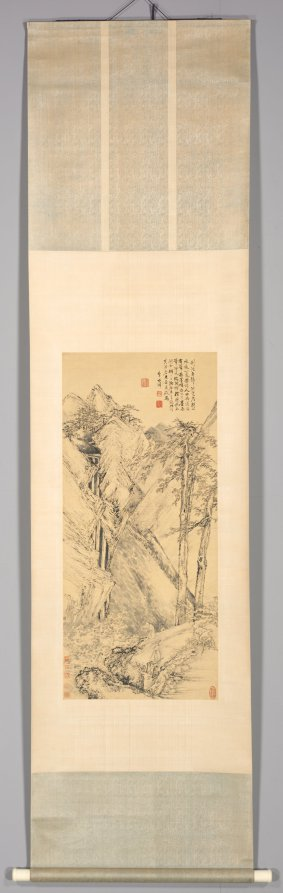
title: Landscape after Jing Hao and Guan Tong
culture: China, Qing dynasty (1644-1911)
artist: Li Shizhuo (Chinese, c. 1690–1770)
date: c. 1690–1770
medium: hanging scroll; ink on paper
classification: Painting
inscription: 荆浩自號洪谷子，乃撰山水訣一卷。嘗誇人曰：吳道子有筆無墨，項容有墨無筆。洪谷故能獨擅操縱，而關仝師之。絢唐末之冠。此臨其佳者而更屛其疵焉。李世倬 [印]卓氏; 穀齋; 蝯詹上_ [印, 右下]几研精嚴見性情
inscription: 5 additional seals: 1 of C. C. Wang 王季遷 (1907–2003); 4 unidentified.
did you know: Three figures on the lower slope excitedly watch the waves and foam rising beneath the waterfall.